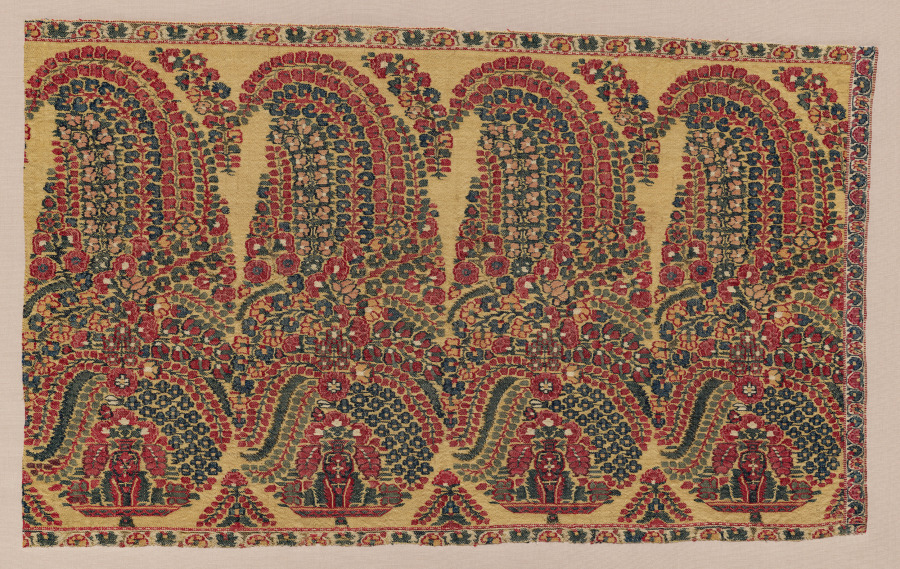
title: Border Fragment of a Shawl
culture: Kashmir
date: early 1800s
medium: wool: tapestry twill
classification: Textile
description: Green, yellow, red, blue, and white woolen threads were woven to create the instantly recognizable Kashmiri teardrop flower patterns on this shawl border. Such a work was part of a larger textile, which would have entranced the viewer with its complexity and vibrancy, especially as it moved with the wearer and contrasted with other articles of clothing.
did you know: The right edge of this textile features a repeating row of wild mulberries and flowers.